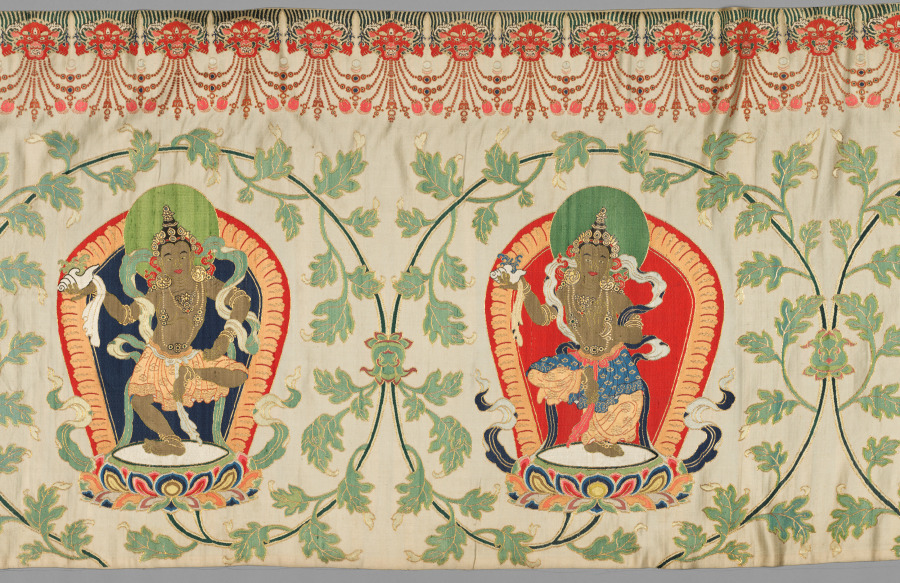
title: Brocaded Strip, known as "Imperial Tribute Brocade"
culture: China, Qing dynasty (1644-1911)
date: c. 1770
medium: brocaded satin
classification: Textile